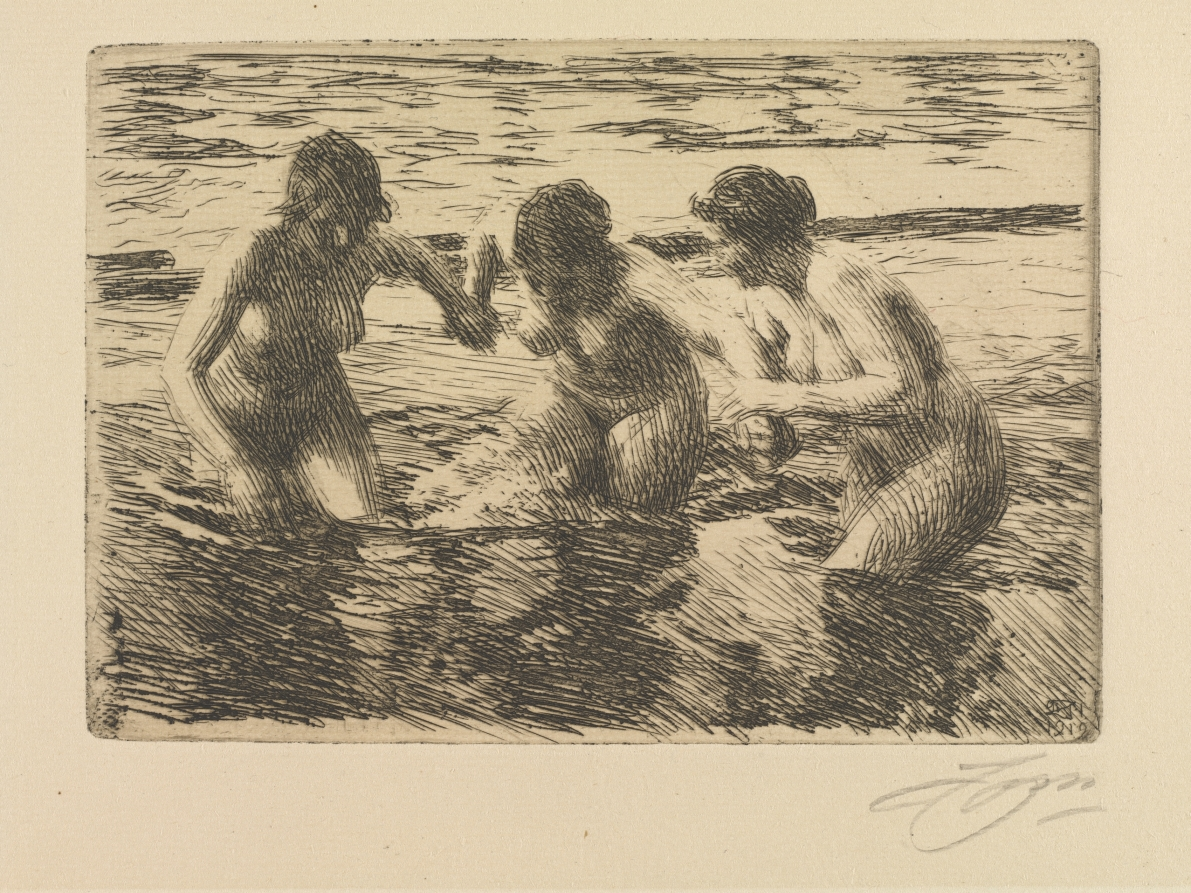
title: Against the Current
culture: Sweden, 20th century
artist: Anders Zorn (Swedish, 1860–1920)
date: 1919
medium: etching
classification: Print